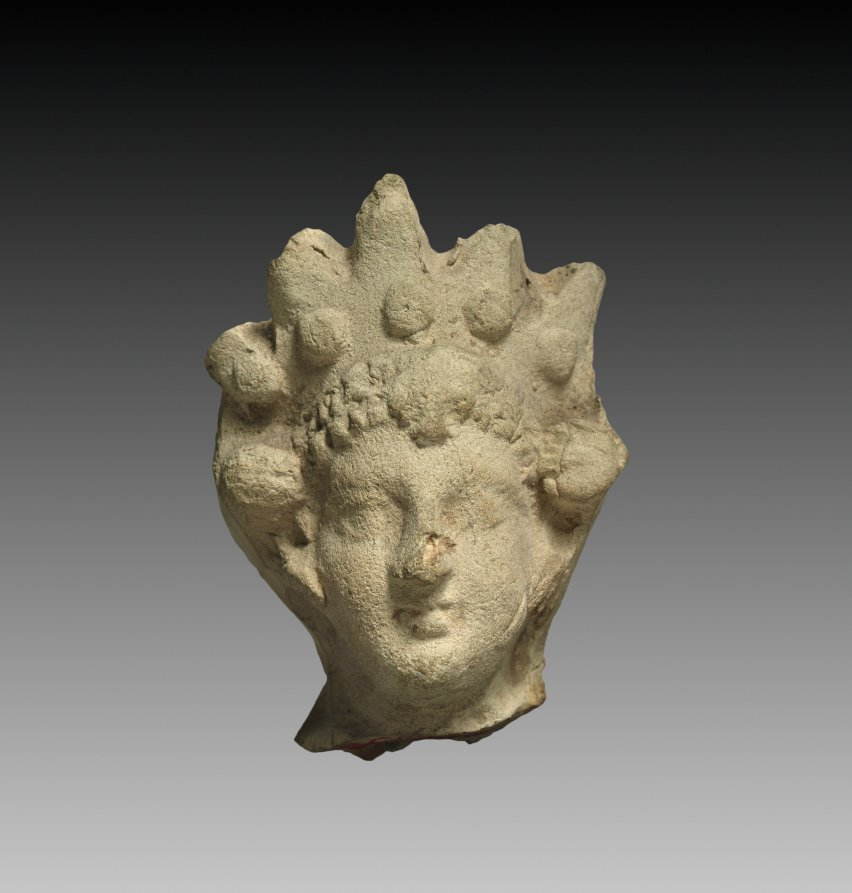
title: Head of a Goddess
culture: Parthian Empire (247 BCE–224 CE)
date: 1–200 CE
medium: terracotta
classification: Sculpture